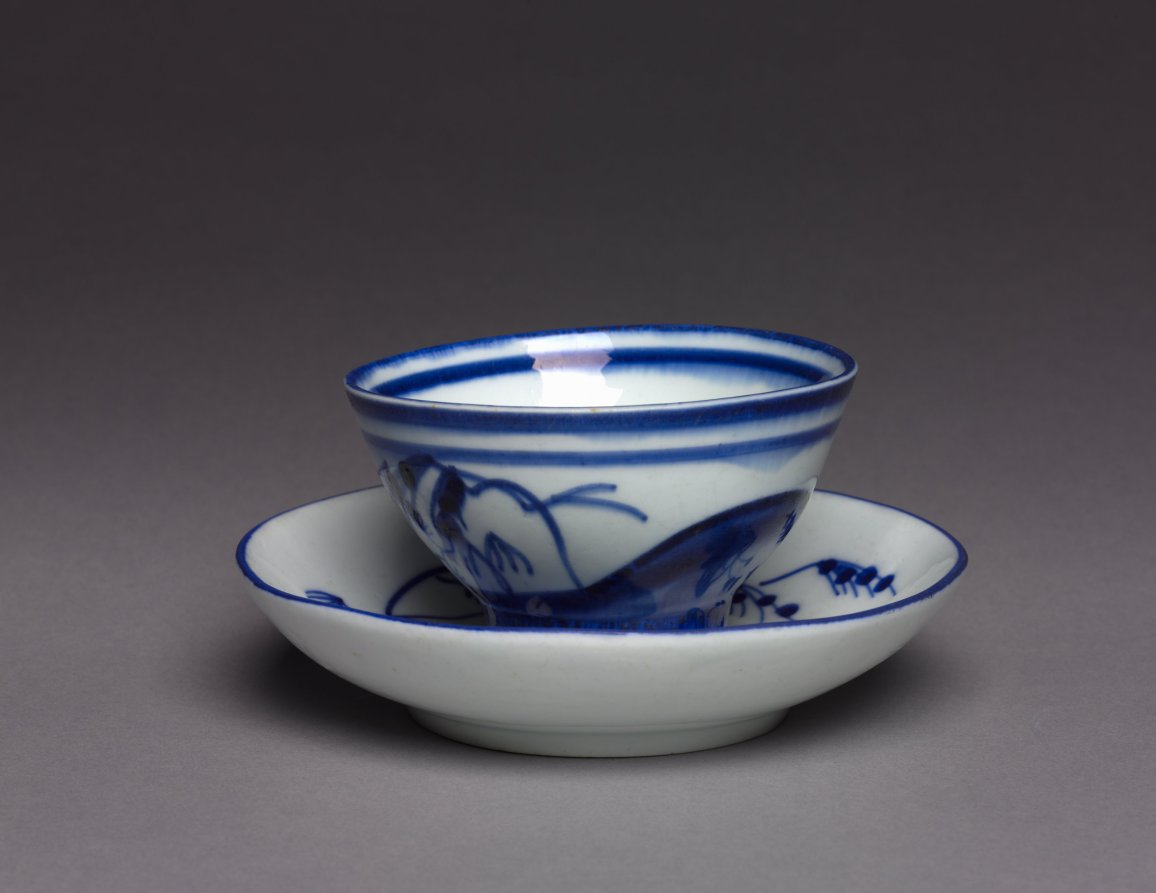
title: Cup and Saucer (Tasse et soucoupe)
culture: France, Chantilly, late 18th-early 19th century(?)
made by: Chantilly Porcelain Factory (French)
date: c. 1775–95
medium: hard-paste porcelain with underglaze blue decoration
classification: Ceramic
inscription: [Hunting horn in underglaze blue beneath cup and saucer]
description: Early French porcelain factories produced ceramics called soft-paste porcelain. Without the addition of the ingredient kaolin, they could not produce the prized hard-paste porcelain of China and Japan. The Chantilly Porcelain Factory only produced hard-paste porcelain in the last decade of the 1700s. Applying the same techniques used on soft-paste to the new hard-paste formula was difficult, which may account for this object’s slightly grayish color and rough blue decoration.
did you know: Early 18th-century porcelain attempted to emulate the blue and white design of Chinese ceramics, but the use of this design on a late 18th-century cup is unusual.